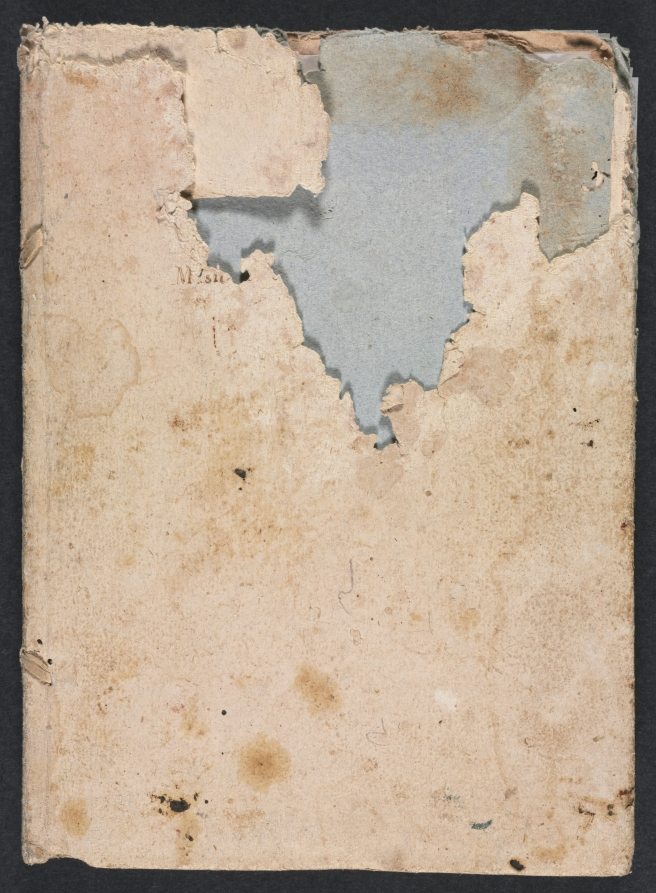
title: Verona Sketchbook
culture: Italy, 18th century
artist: Francesco Lorenzi (Italian, 1723–1787)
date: 1760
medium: chalk drawing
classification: Bound Volume